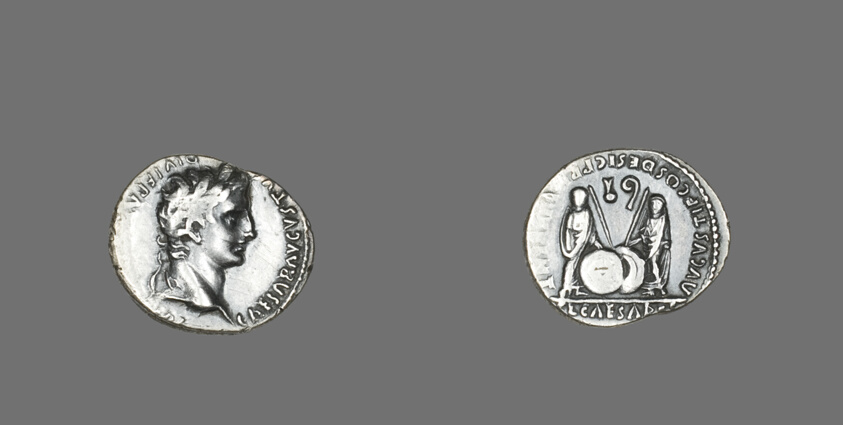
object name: Coin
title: Denarius (Coin) Portraying Emperor Augustus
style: roman (ancient, style or period), ancient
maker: Roman; minted in Lugdunum (now Lyon, France)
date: 2 BCE-4 CE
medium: Silver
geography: Italy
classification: coin; ancient art; struck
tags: Chariots, priest